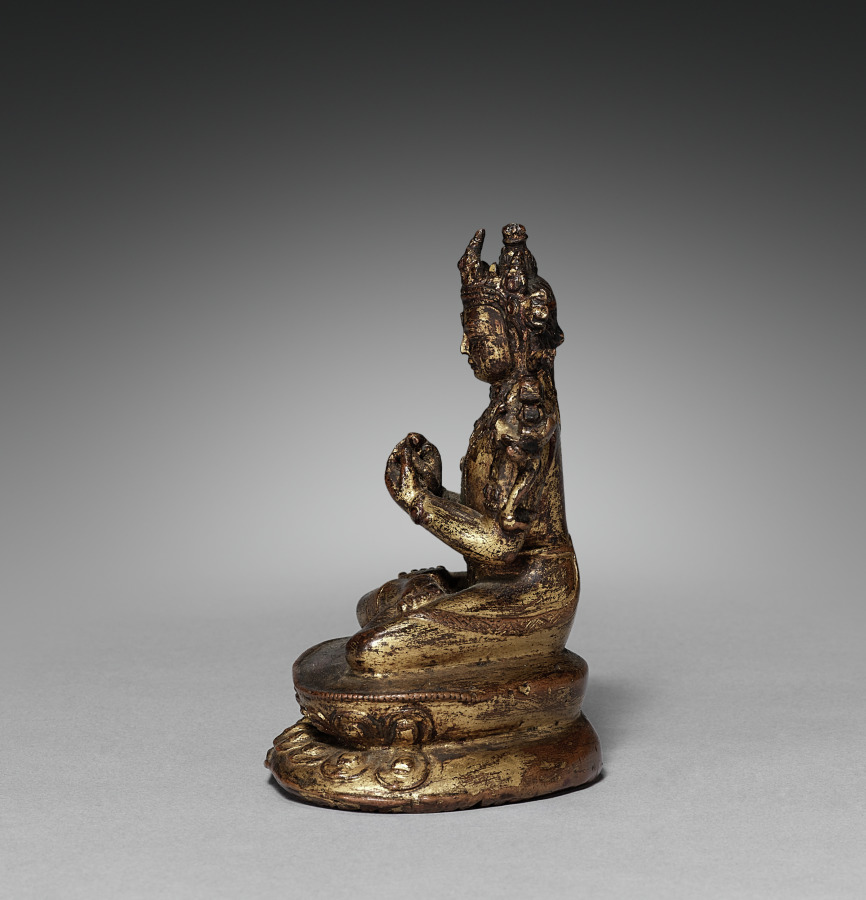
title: Manjuvara Turning the Wheel of the Law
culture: Nepal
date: 1300s–1400s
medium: gilded copper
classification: Sculpture